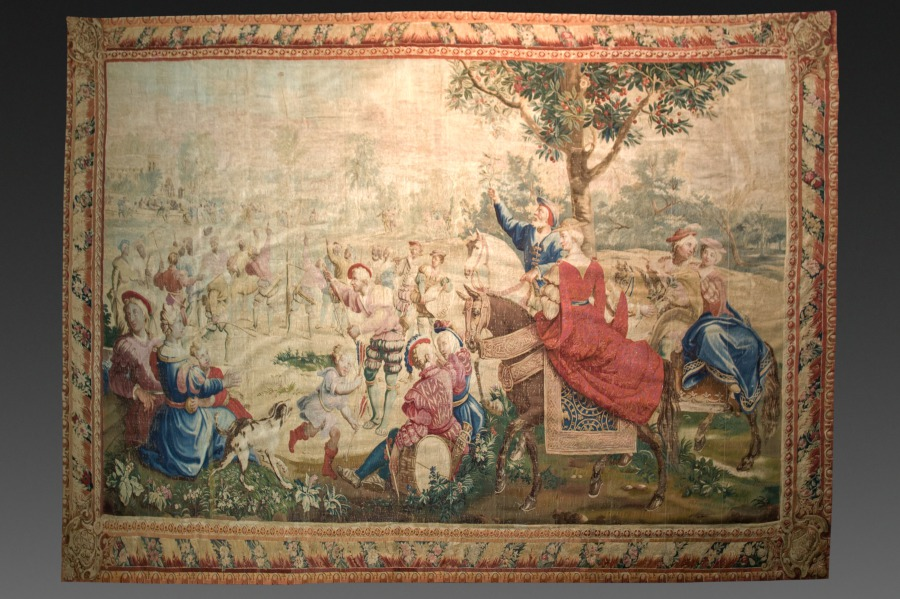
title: Month of May: Scene of May Day Festival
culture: France, 18th century, Period of Louis XV (1723-1774)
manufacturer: Gobelins Manufactory (France, Paris, est. 1662)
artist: Michel Audran (French, 1701–1771)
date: 1723–1774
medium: tapestry weave: linen warp, wool and silk wefts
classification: Tapestry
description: Seated spectators and splendidly clothed ladies and gentlemen on horseback watch May Day festivities in this tapestry. In the middle distance, archers prepare to shoot at a bush and bird placed atop a maypole, while more spectators congregate in the receding landscape. A border of rolled acanthus leaves and flower garlands frames the scene. This scene is one of twelve so-called Months of Lucas tapestries, each depicting activities that coincide with a month of the year. The original “Months of Lucas” was a sixteenth-century Flemish tapestry set that was owned by the French monarchy and mistakenly attributed to Lucas van Leyden during the 1600s. To this day, they continue to be known as the “Months of Lucas.” This original set was burned in 1797 so their gold and silver metal threads could be used to replenish the depleted French coffers. Beginning in the 1600s, the popular Months of Lucas were reproduced in several different versions under various masters at the Gobelins Manufactory in Paris, the famous royal production center for French tapestries since Louis XIV (1638–1715). The lower right hand corner of this tapestry bears the signature of Michel Audran (1701–1771), director of the Gobelins high-warp loom workshop from 1732–71, who produced this tapestry for a private patron in addition to the other royal commissions of the set.